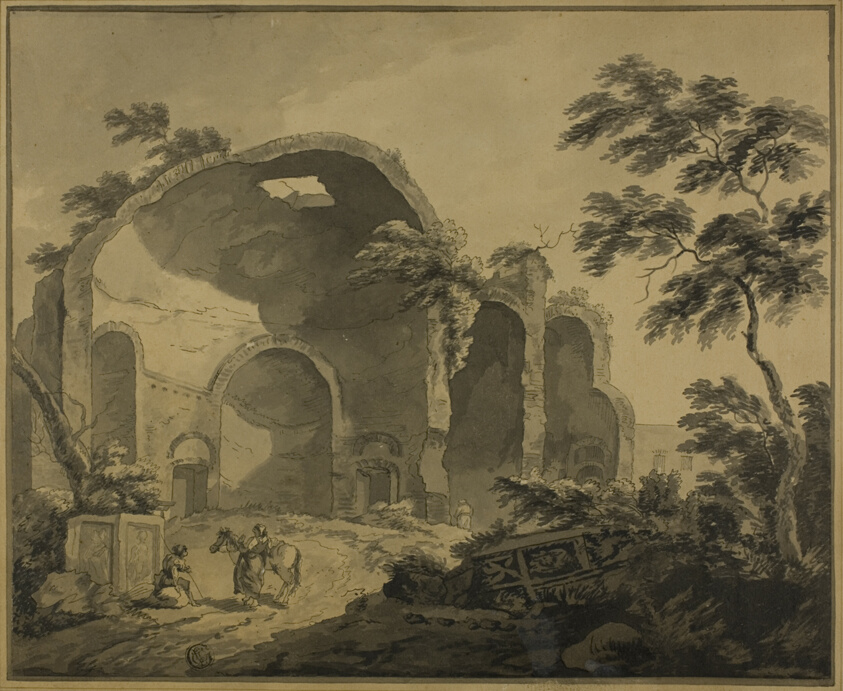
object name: Drawing and Watercolor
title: Roman Ruins with Two Peasants Conversing in the Foreground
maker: Charles Louis Clérisseau (French, 1722-1820); or Style of Jean Baptiste Pillement (French, 1719/28-1808)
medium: Pen and black ink, with brush and gray and black wash, on tan laid paper, laid down on tan laid paper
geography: France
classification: ink or chalk wash; drawings (visual works); prints and drawing